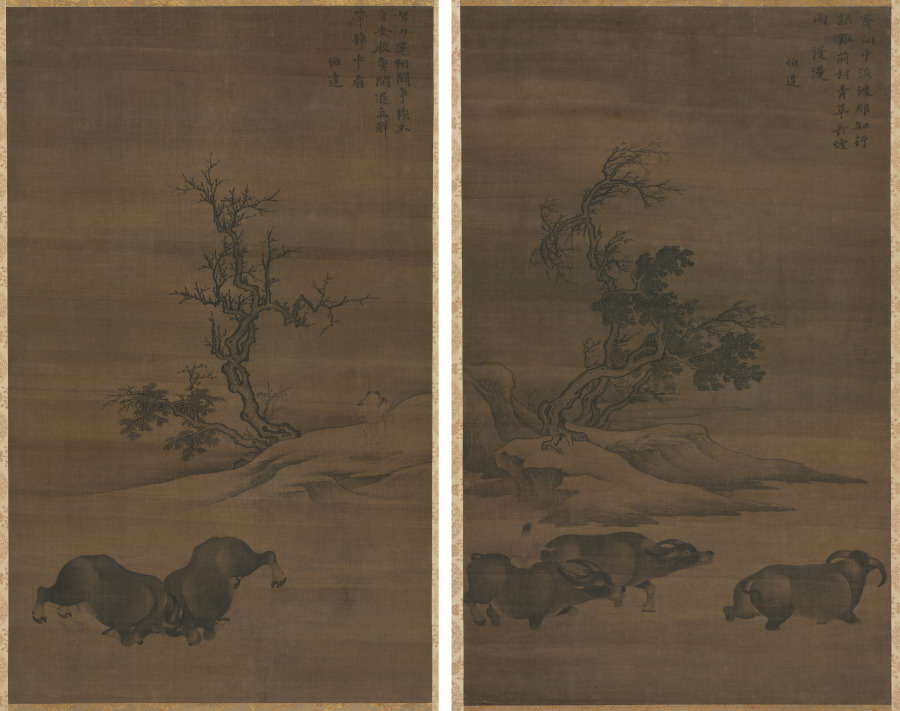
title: Herdboys and Buffalo in Landscapes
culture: China, Qixian, Yuan dynasty (1271-1368)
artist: Guo Min (Chinese, mid-late 1200s)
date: 1200s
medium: Pair of hanging scrolls; ink on silk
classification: Painting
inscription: 努力還相鬪，爭強不自安。/ 牧童閑退立，解帶靜中看。/ 伯達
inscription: 齊向中流渡，那知行路難。/ 前村青草長，煙雨□漫漫。/ 伯達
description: Herdboys tend their buffalo in a bucolic landscape by a winding stream. Guo Min emphasizes the massive forms and mighty power of the animals, transforming them into forces of nature. The poem in the first scroll reads: "The bulls are engaging in fighting, Cautiously, each seeks to overcome the other. The herdboy calmly stands by. Untying his belt, he silently watches." The poem in the second scroll reads: "Together, they wade through the middle of the stream, Mindless of perils in the journey. The grass grows tall in the village ahead, While the mist and rain spread far and wide."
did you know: Tending water buffalos has traditionally been the task of young boys and can still be seen in rural areas of Southern China today.